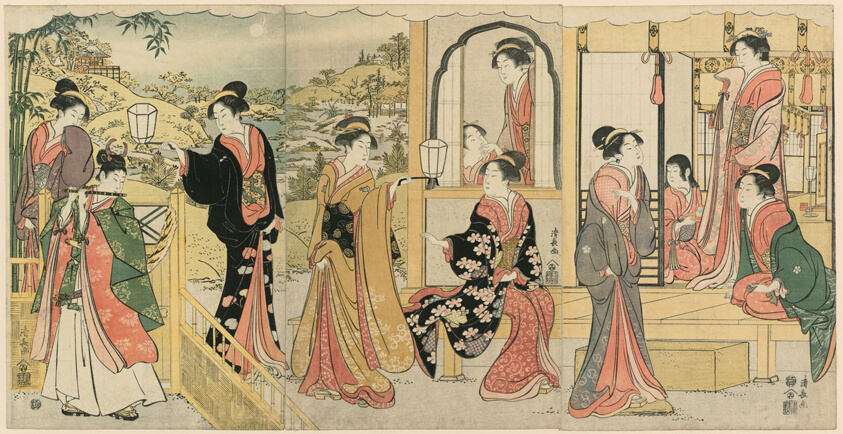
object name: Print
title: A Modern Version of Ushiwakamaru Serenading Princess Joruri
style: Japanese (culture or style)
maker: Torii Kiyonaga (Japanese, 1752-1815)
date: c. 1785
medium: Color woodblock prints; oban triptych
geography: Japan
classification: woodblock print; print; asian art